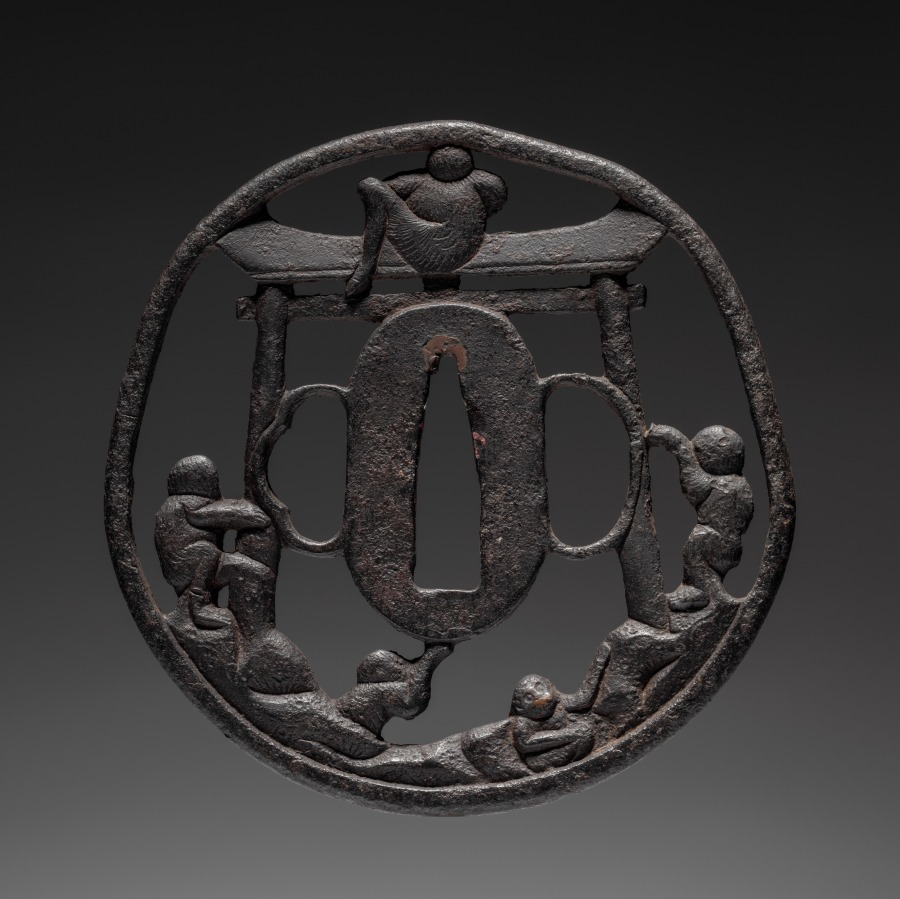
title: Sword Guard (Tsuba) with Hiyoshi Taisha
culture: Japan, possibly Edo period (1615-1868)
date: c. 1615–1868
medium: iron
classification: Arms and Armor